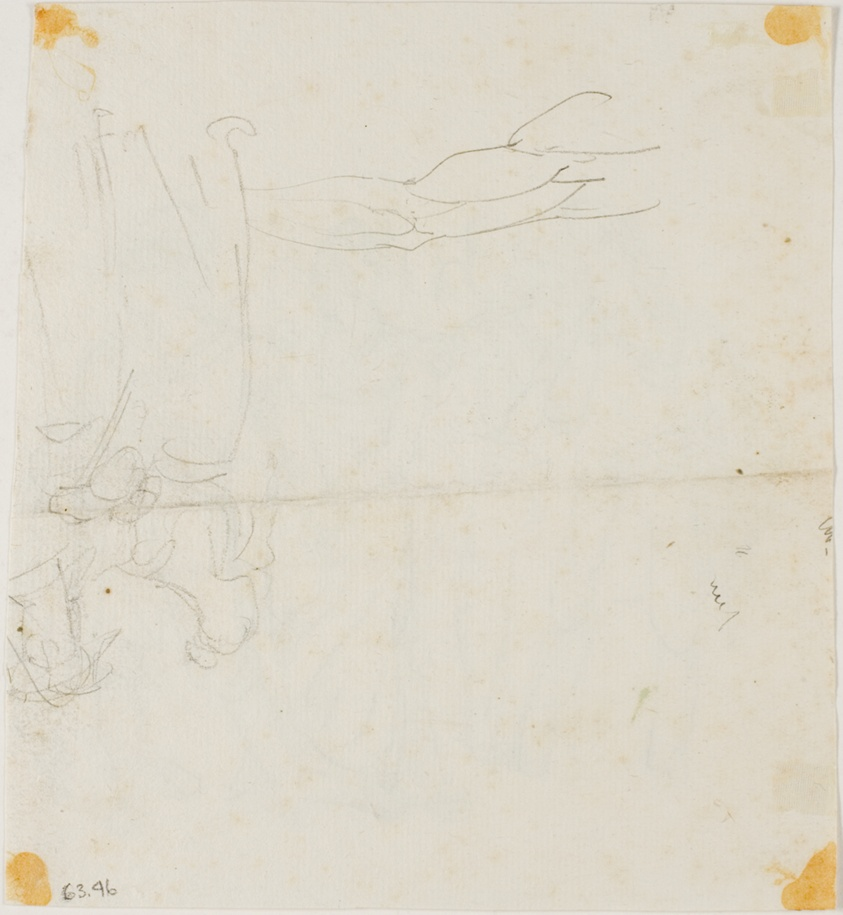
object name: Drawing and Watercolor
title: Brigand Chief Held Back By a Woman (recto); Sketch fo Two Figures in a Landscape (verso)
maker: Bartolomeo Pinelli (Italian, 1781-1835)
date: 1801/35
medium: Graphite (recto and verso) on ivory laid paper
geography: Italy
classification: graphite; drawings (visual works); prints and drawing